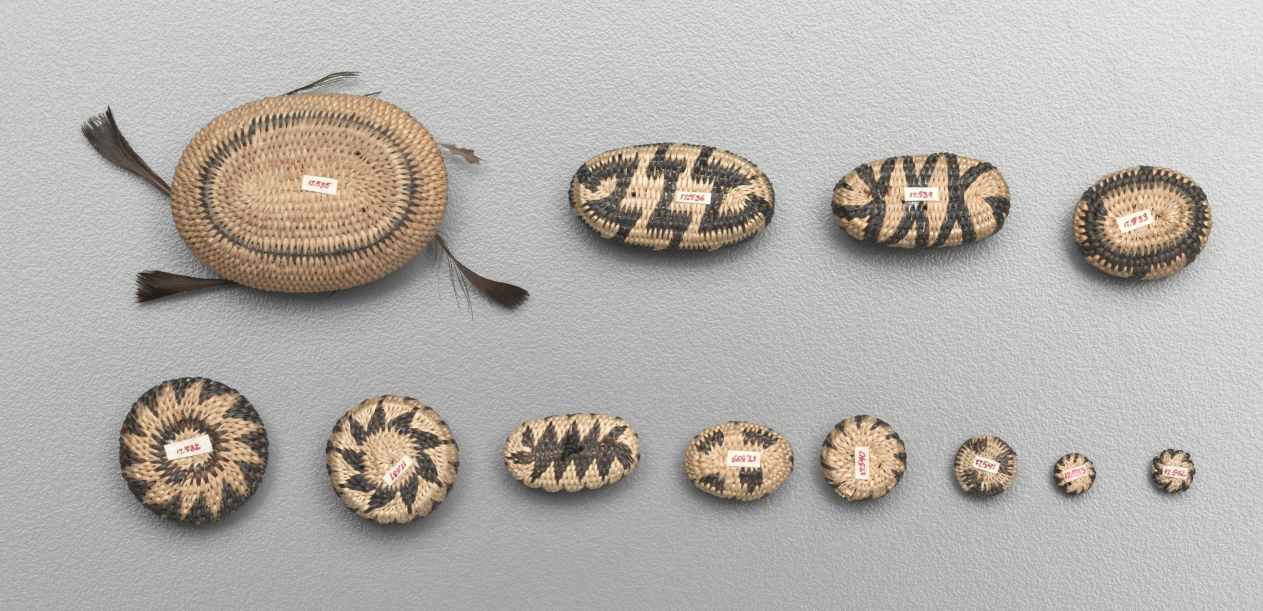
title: Miniature Rhomboidal Basket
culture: California, Pomo, late 19th-early 20th century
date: late 1800s-early 1900s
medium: plant materials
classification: Basketry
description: Miniature baskets were made to demonstrate the basket-maker’s virtuoso skill, and these tiny marvels seem to be no exception—the smallest are just a few millimeters wide but still patterned. For such fine work, dexterity was required as much for preparation of materials as for weaving.